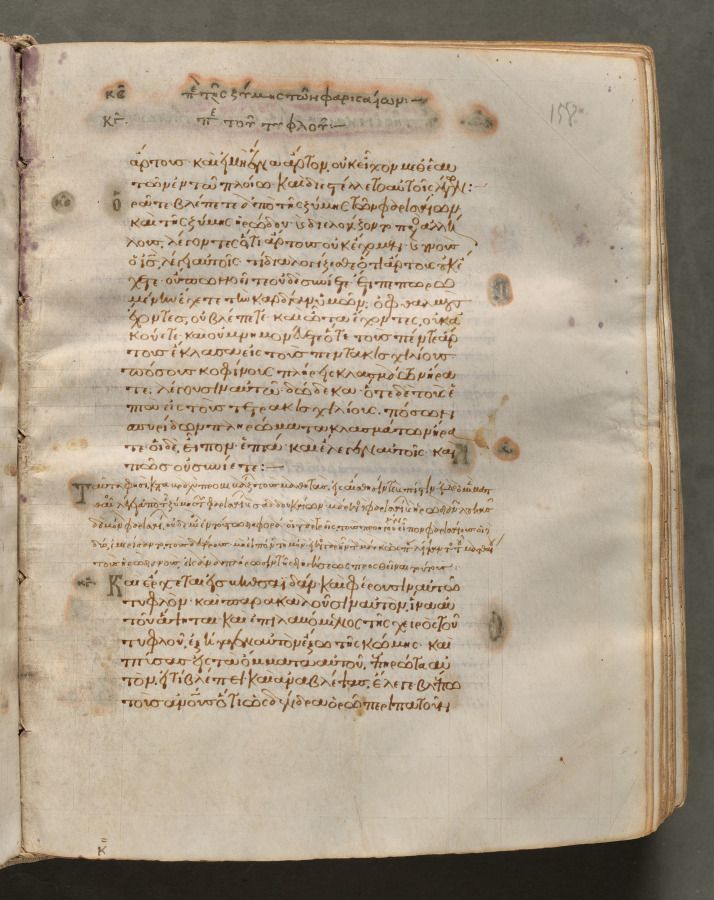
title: Text, folio 158 (recto), from a Gospel Book with Commentaries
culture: Byzantium, Constantinople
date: c. 1000–1100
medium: ink, tempera, and gold on vellum; leather binding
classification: Bound Volume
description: Each of the four gospels in this book opens on a page with brilliantly illuminated borders depicting the author of the text as well as birds-principally peacocks, symbols of the immortality of the soul-and fountains, representing the fountain of life and the salvation of the soul. This volume consists of 428 leaves with texts in Greek. Its level of sophistication suggests that it was probably written and decorated in a monastery in Constantinople.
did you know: Gospel Books were carried in procession through Byzantine churches.